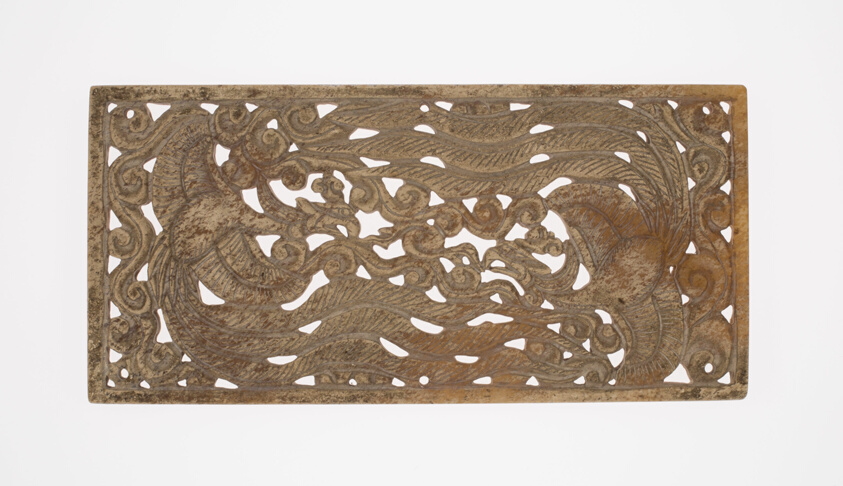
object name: Religious/Ritual Object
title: Plaque with Openwork Phoenix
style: Chinese (culture or style)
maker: China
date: Five Dynasties period (907–960) / Yuan dynasty (1271–1368), 10th/14th century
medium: Jade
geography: China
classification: jade; asian art; ritual objects